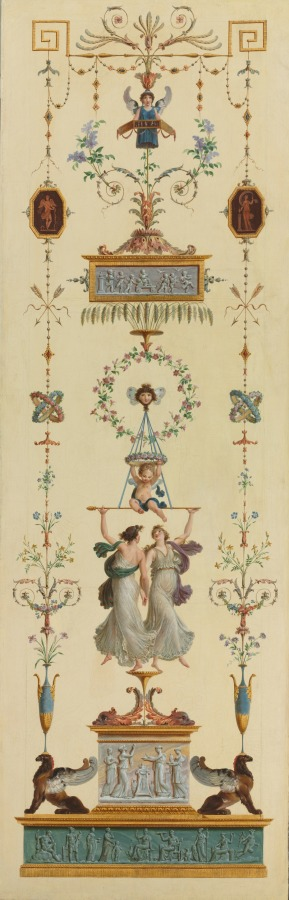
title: Decorative Panels, Double-leaf Doors, Overdoor Paintings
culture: France, 18th century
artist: Pierre Rousseau (French, 1751–1829)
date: 1790s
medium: oil on canvas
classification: Painting